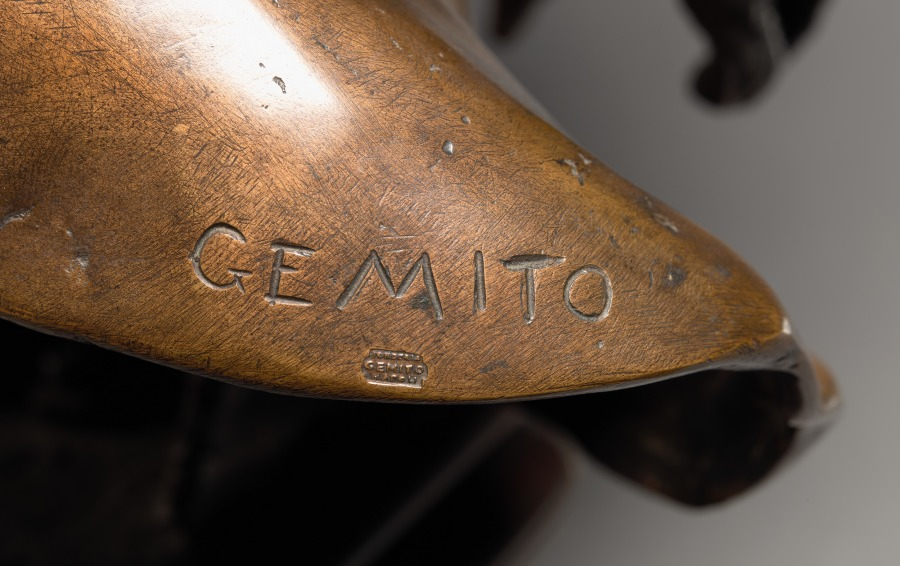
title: Head of a Philosopher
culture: Italy, 19th century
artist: Vincenzo Gemito (Italian, 1852–1929)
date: 1883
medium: bronze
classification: Sculpture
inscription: Signed: "Gemito"; stamped: "FONDERIA GEMITO NAPOLI"